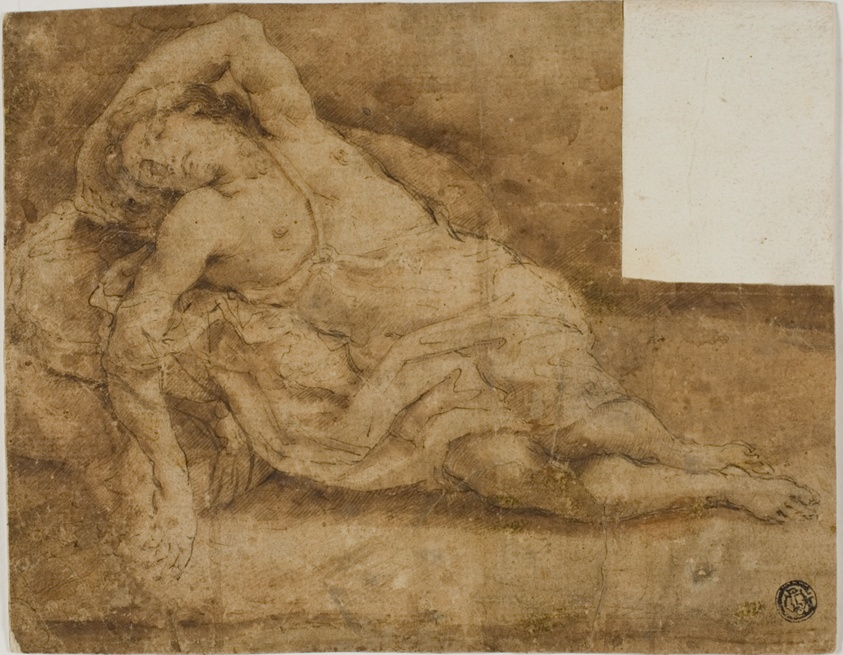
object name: Drawing and Watercolor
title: Sleeping Figure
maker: Unknown Artist; Italian, Bologna, 17th century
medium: Pen and brown ink, with brush and brown wash, over traces of black chalk, on tan laid paper, laid down on ivory laid paper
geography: Italy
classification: ink or chalk wash; drawings (visual works); prints and drawing